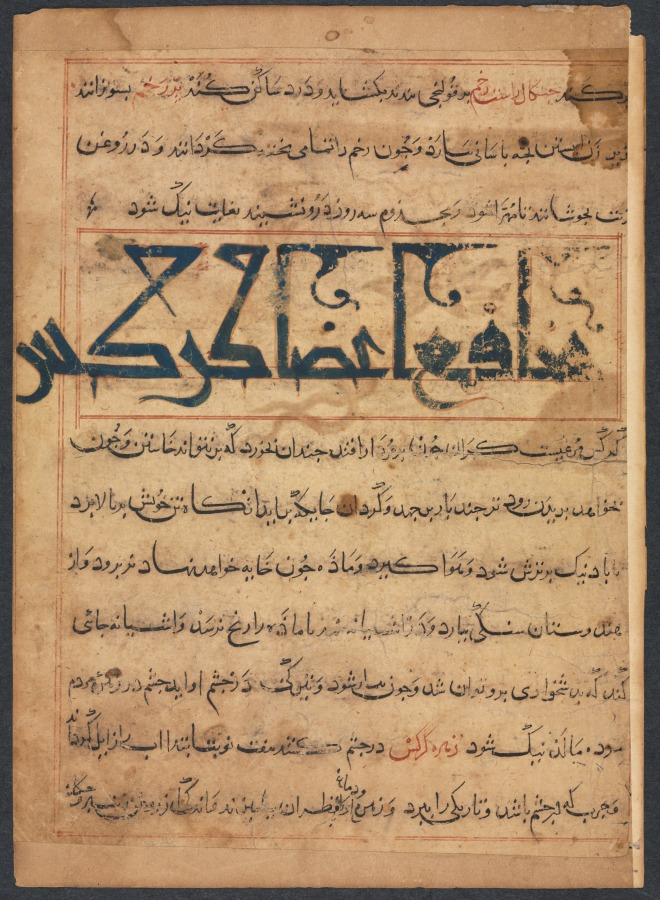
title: "Benefits of the Parts of Vultures" (From the Manafi' al-Haywan of Abu Sai'd Ubayd-Allay Ibn Bakhtishu)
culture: Iran, Marageh, Mongol Period (Ilkhanid), late 13th Century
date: late 1200s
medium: opaque watercolor, ink and gold on paper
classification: Manuscript